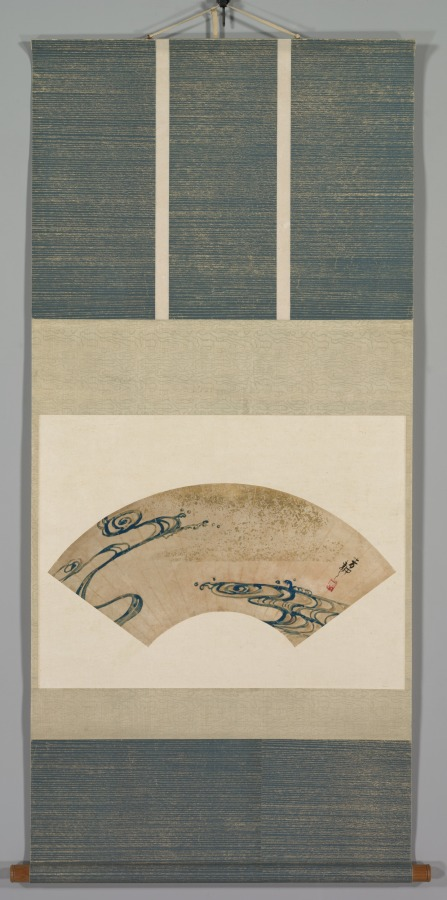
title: Waves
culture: Japan, Edo period (1615–1868)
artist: Nakamura Hōchū (Japanese, d. 1819)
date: late 1700s-early 1800s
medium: fan painting mounted as a hanging scroll; ink and color with gold on paper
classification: Painting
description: Nakamura Hōchū painted waves on this handheld fan to bring coolness to the mind of its bearer. While fragile paper fans are often used for a single season, this one was cherished for its design. Someone carefully removed it from its folding apparatus and converted it into a hanging scroll for occasional enjoyment in an alcove.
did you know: Nakamura Hōchū took inspiration for his work from the painter Ogata Kōrin.